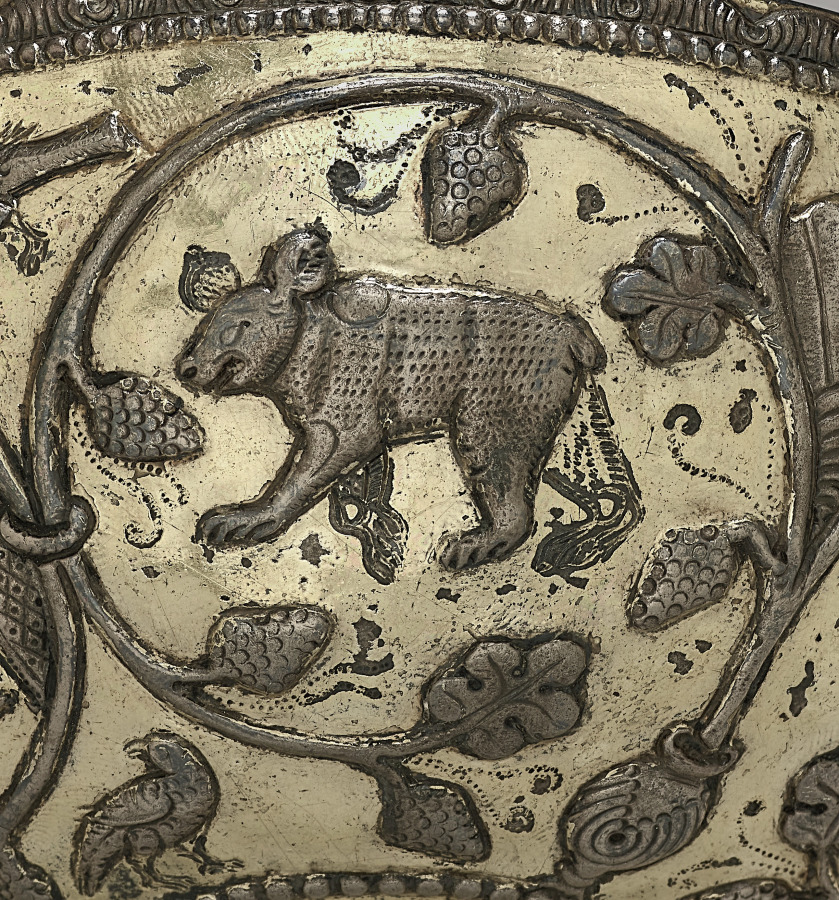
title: Bowl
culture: Iran, Sasanian Empire (224–651 CE)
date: 500–700 CE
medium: silver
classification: Metalwork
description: Every good Zoroastrian was supposed to spend one-third of his day farming; one-third philosophizing; and one-third eating, resting, and at pleasure. The abundance of Sasanian luxury goods is evidence of the importance accorded the last third of the day.